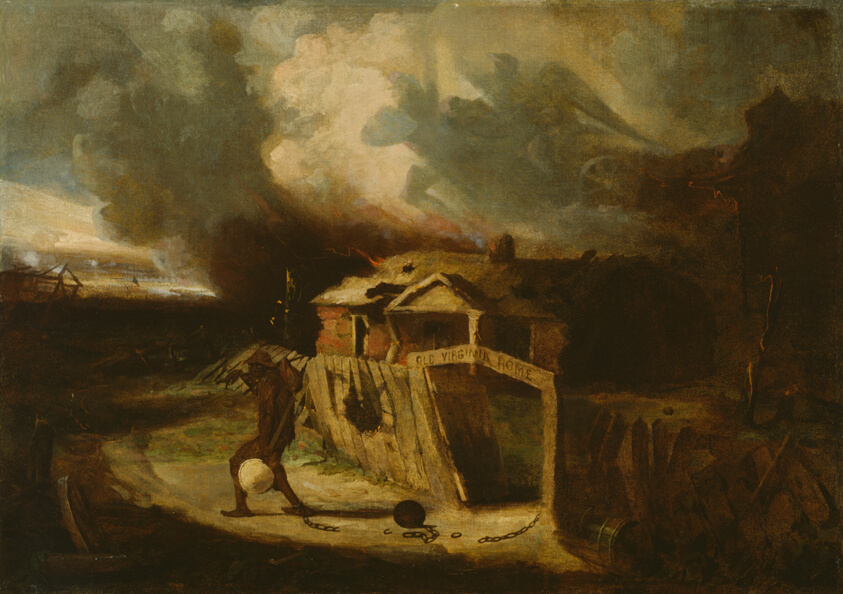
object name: Painting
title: Old Virginia Home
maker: David Gilmour Blythe (American, 1815–1865)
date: 1864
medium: Oil on canvas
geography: Virginia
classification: painting; american arts